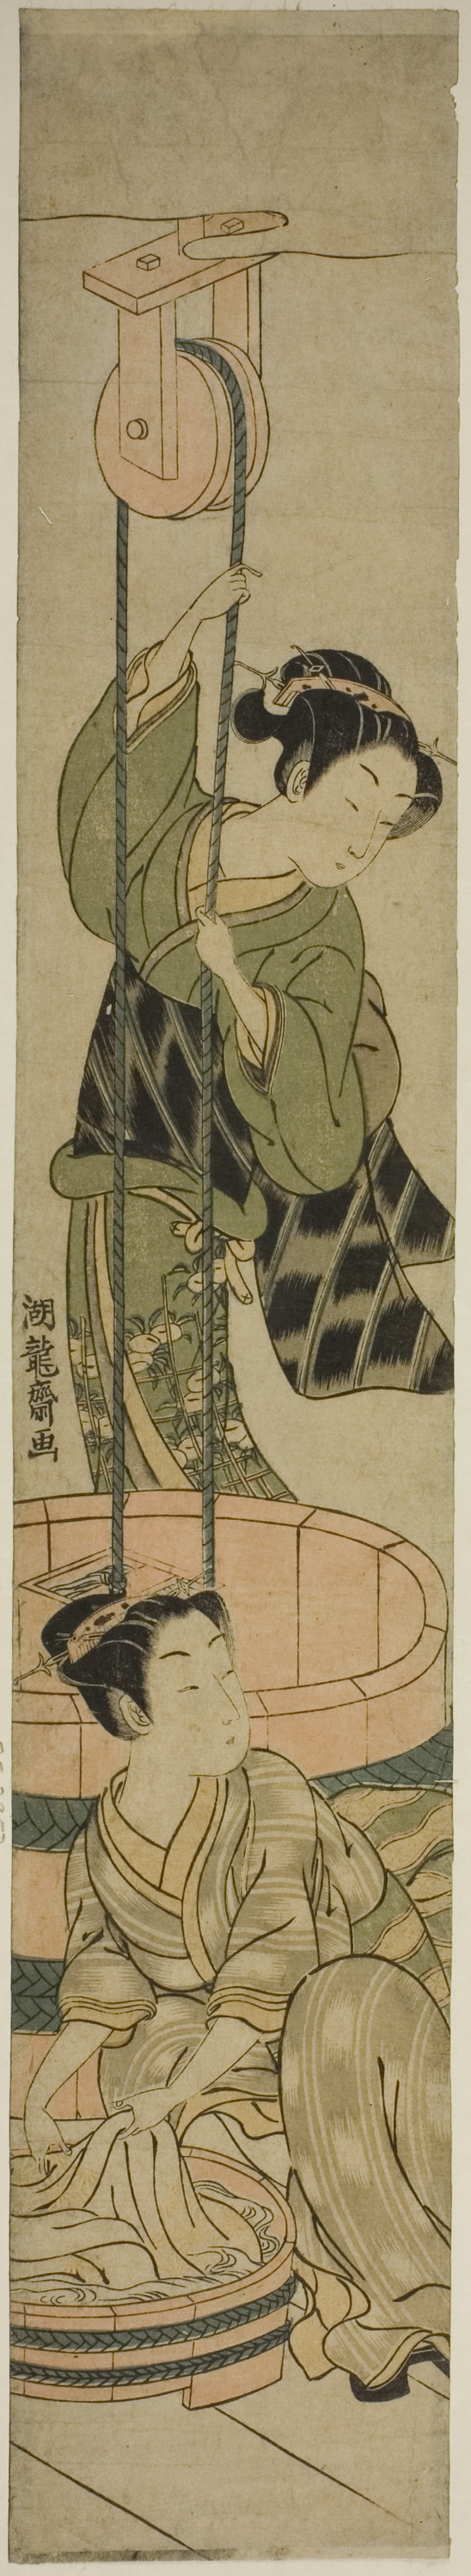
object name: Print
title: Women Washing Clothes at Well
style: Japanese (culture or style)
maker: Isoda Koryusai (Japanese, 1735-1790)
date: c. 1764/75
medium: Color woodblock print; hashira-e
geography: Japan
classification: woodblock print; print; asian art